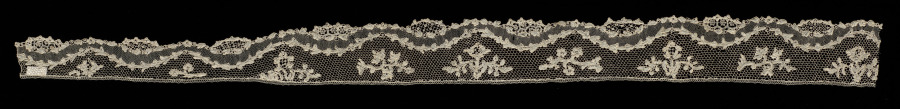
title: Fragment of Lace Garniture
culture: France, Argentan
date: 1700s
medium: Linen: needle lace (Point de Argentan)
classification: Lace